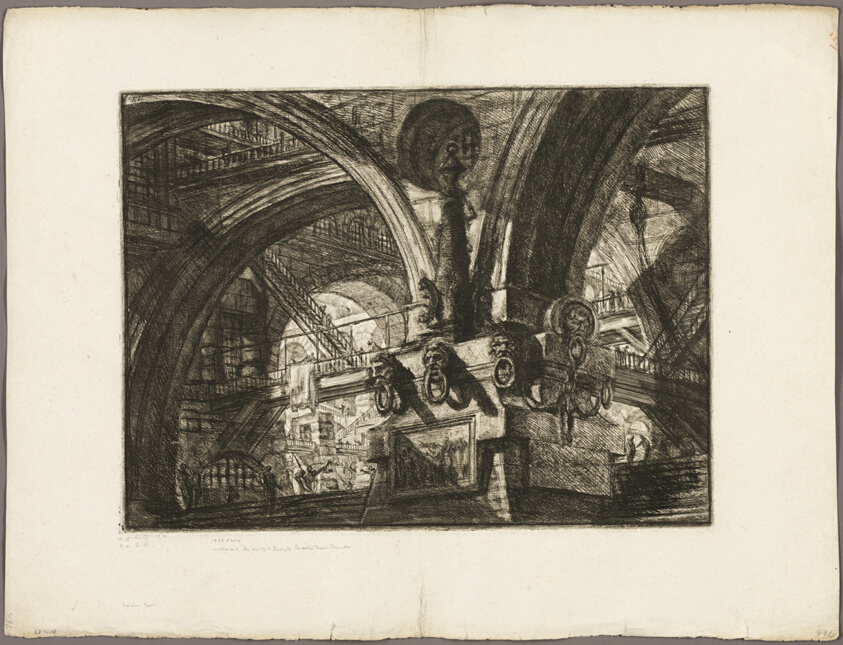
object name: Print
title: The Pier with a Lamp, plate 15 from Imaginary Prisons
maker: Giovanni Battista Piranesi (Italian, 1720-1778)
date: 1761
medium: Etching and engraving on heavy ivory laid paper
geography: Italy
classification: etching; print; prints and drawing